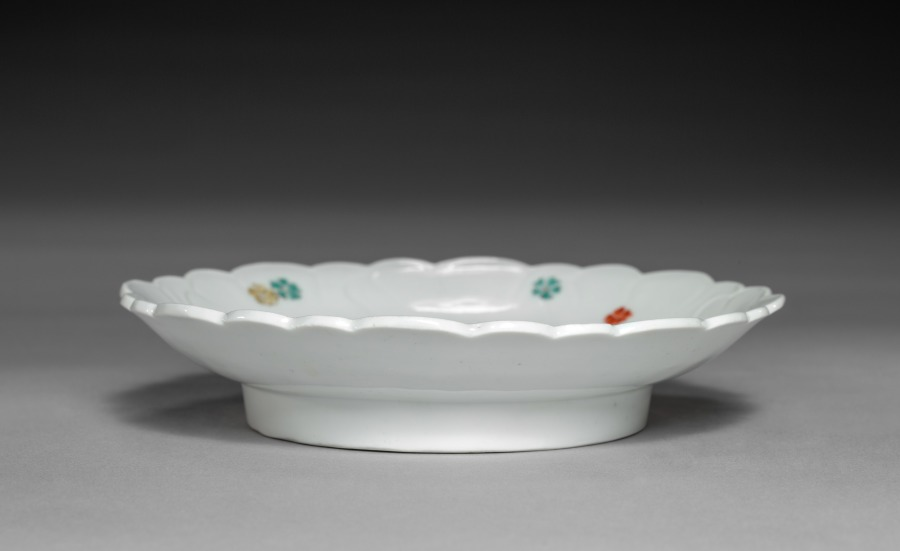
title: Small Dish with Flowers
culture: Japan, Edo period (1615–1868)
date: late 1600s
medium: porcelain with overglaze color enamel and molding (Hizen ware, Kakiemon type)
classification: Ceramic